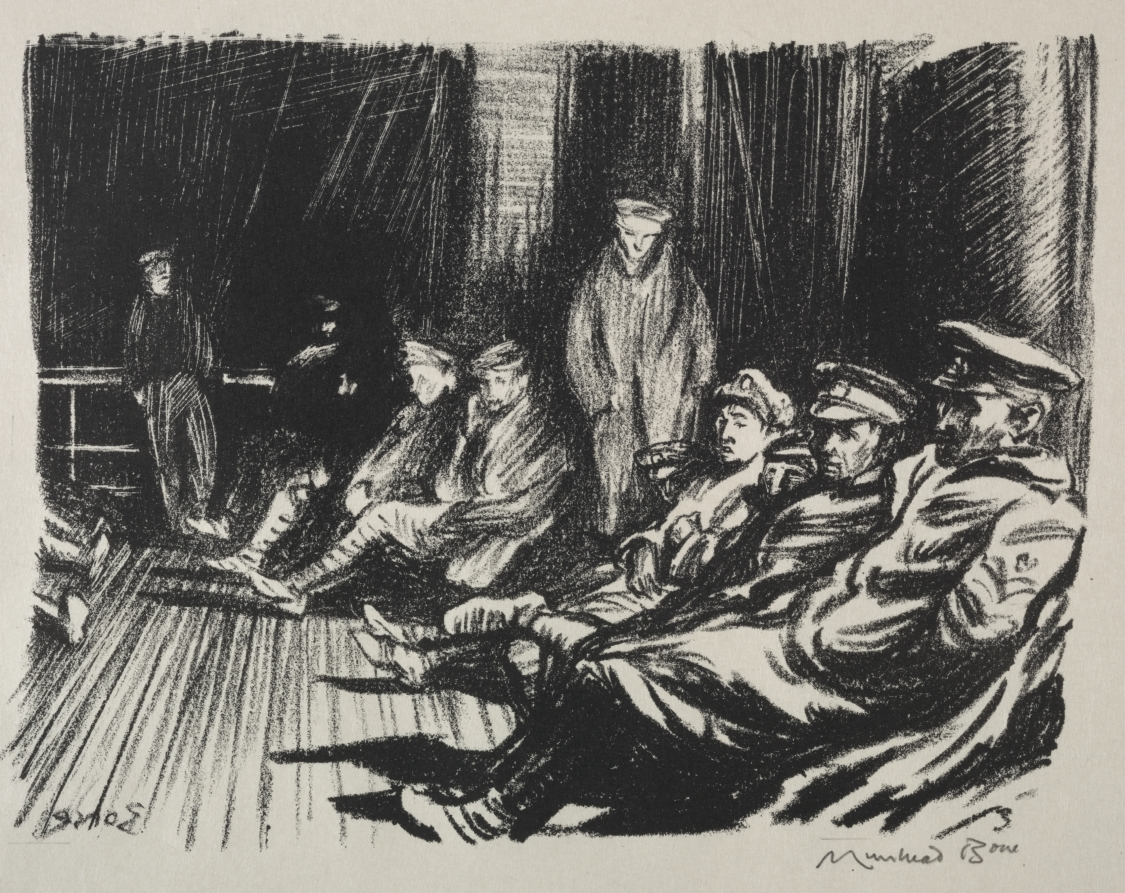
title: Walking Wounded on a Hospital Ship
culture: England, 20th century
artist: Muirhead Bone (British, 1876–1953)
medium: lithograph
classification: Print